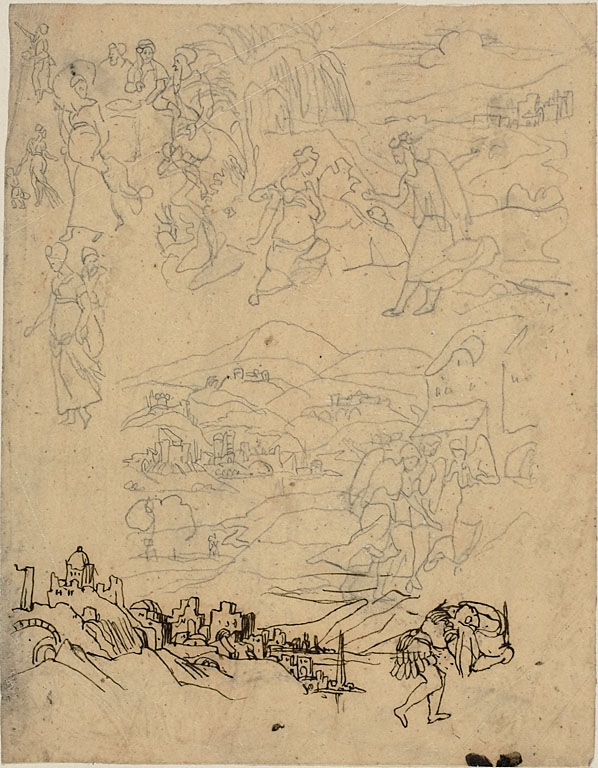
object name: Drawing and Watercolor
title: Sketches of Biblical Scenes, Town by Lake, Mountain Village, Warrior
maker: Rodolphe Bresdin (French, 1825-1885)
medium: Pen and brown ink and graphite, on tan wove paper laid down on ivory wove paper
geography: France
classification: graphite; drawings (visual works); prints and drawing